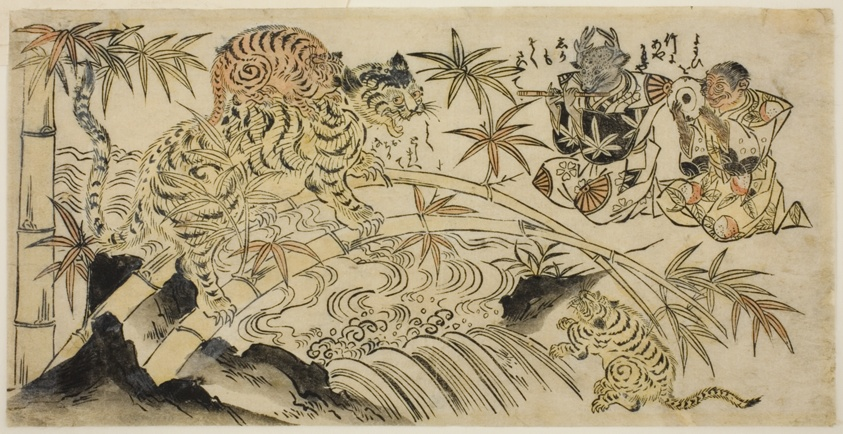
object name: Print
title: The Bad Tiger Cub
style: Japanese (culture or style)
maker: Artist Unknown; Japanese, 18th century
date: c. 1730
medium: Hand-colored woodblock print; hosoban yoko-e, urushi-e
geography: Japan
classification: woodblock print; print; asian art